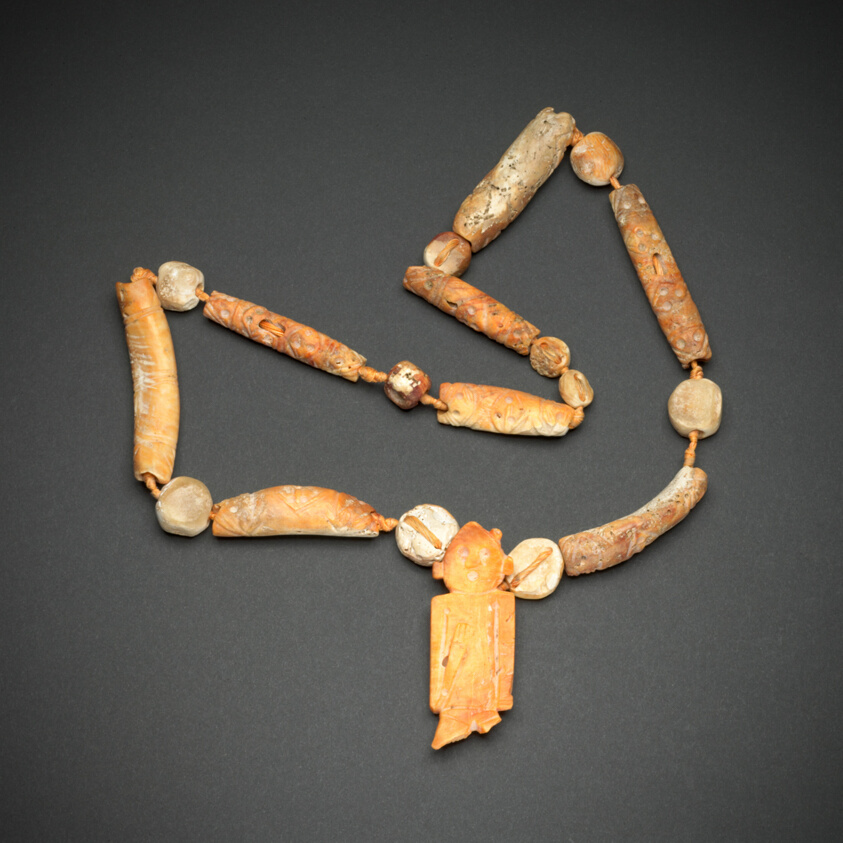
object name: Costume and Accessories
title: Necklace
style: colima, mesoamerican, Pre-Columbian, americas, jalisco, west mexico, Arts of the Americas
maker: Colima or Jalisco; Colima or Jalisco, Mexico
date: 200 BCE–200 CE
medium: Spondylus shell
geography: Western Mexico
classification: shell; art of the americas; jewelry; costume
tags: jewelry, shells, figures (representations), water